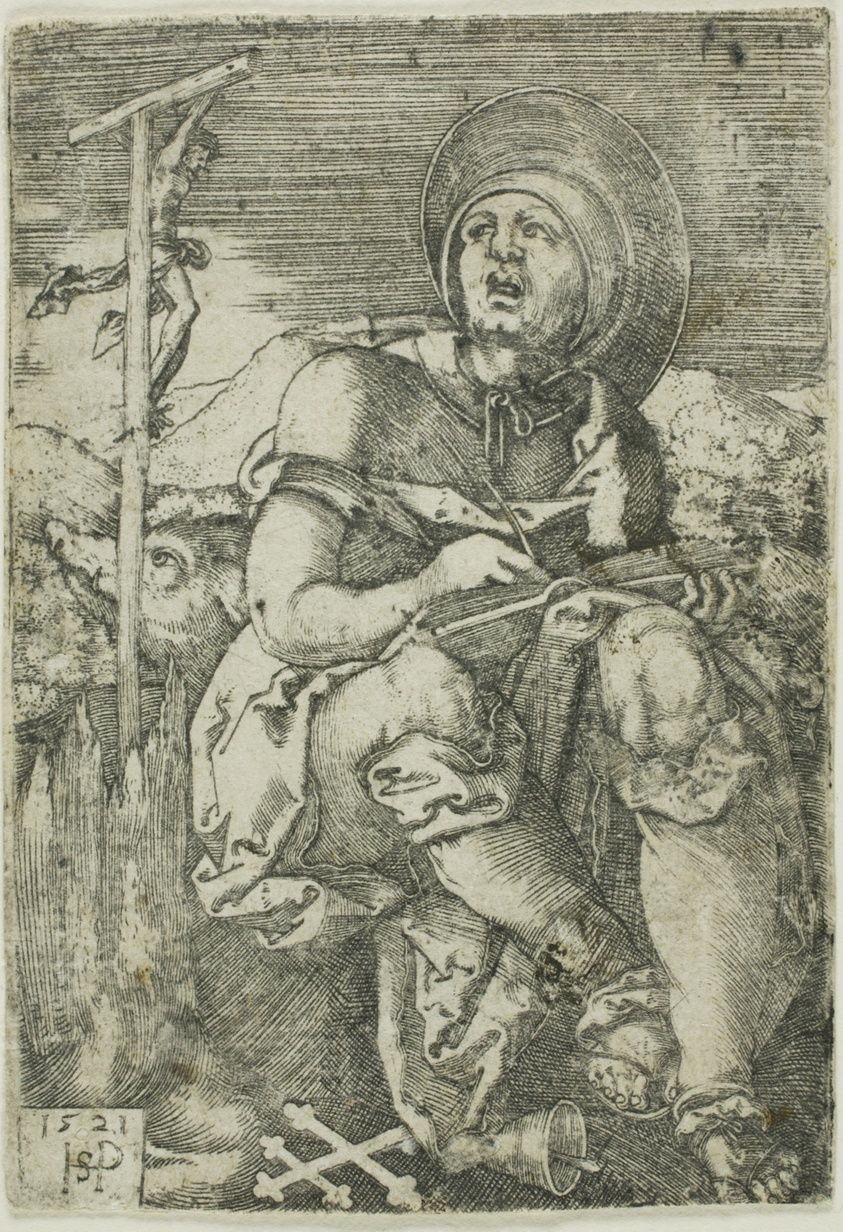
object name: Print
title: St. Anthony the Hermit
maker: Sebald Beham; German, 1500-1550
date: 1521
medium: Engraving in black on ivory laid paper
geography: Germany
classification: engraving; print; prints and drawing